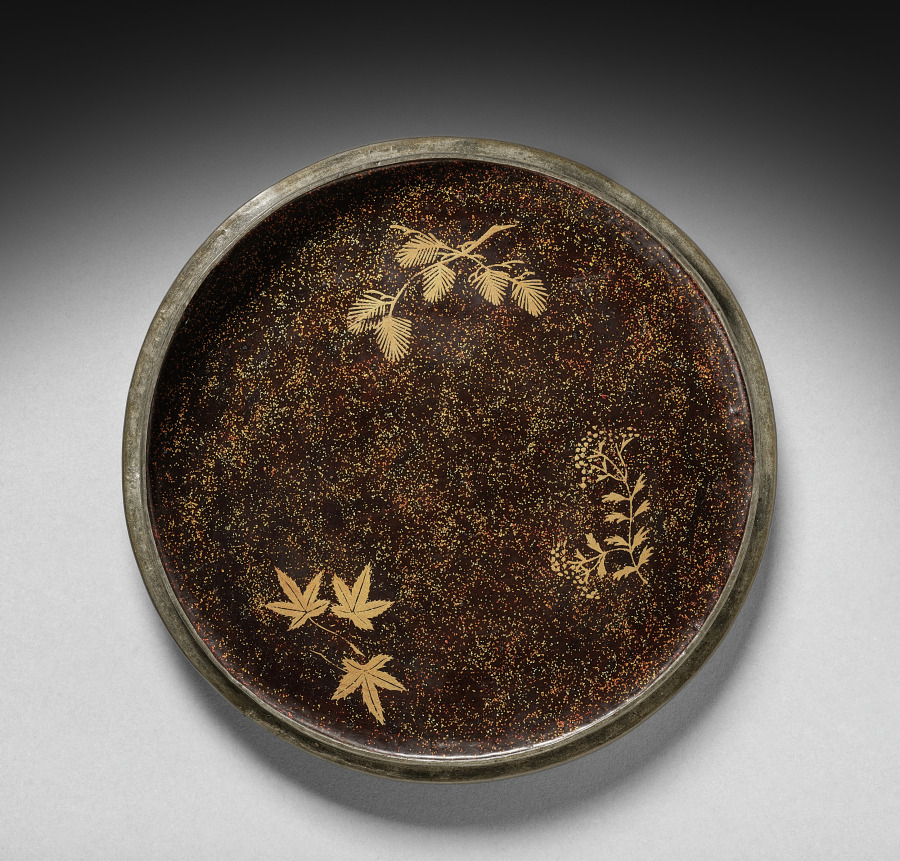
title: Mirror Container with Design of Maple Tree and Autumn Shower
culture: Japan, Muromachi period (1392–1573)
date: 1400s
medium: lacquer on wood with decoration in maki-e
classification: Lacquer